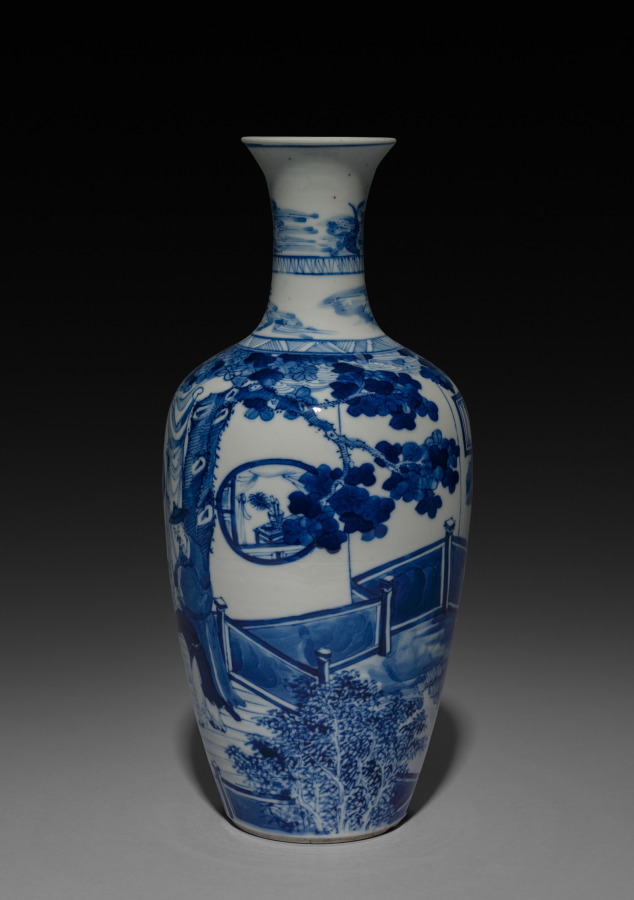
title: Vase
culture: China, Qing dynasty (1644-1911), Kangxi reign (1661-1722)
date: 1662–1722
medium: porcelain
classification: Ceramic